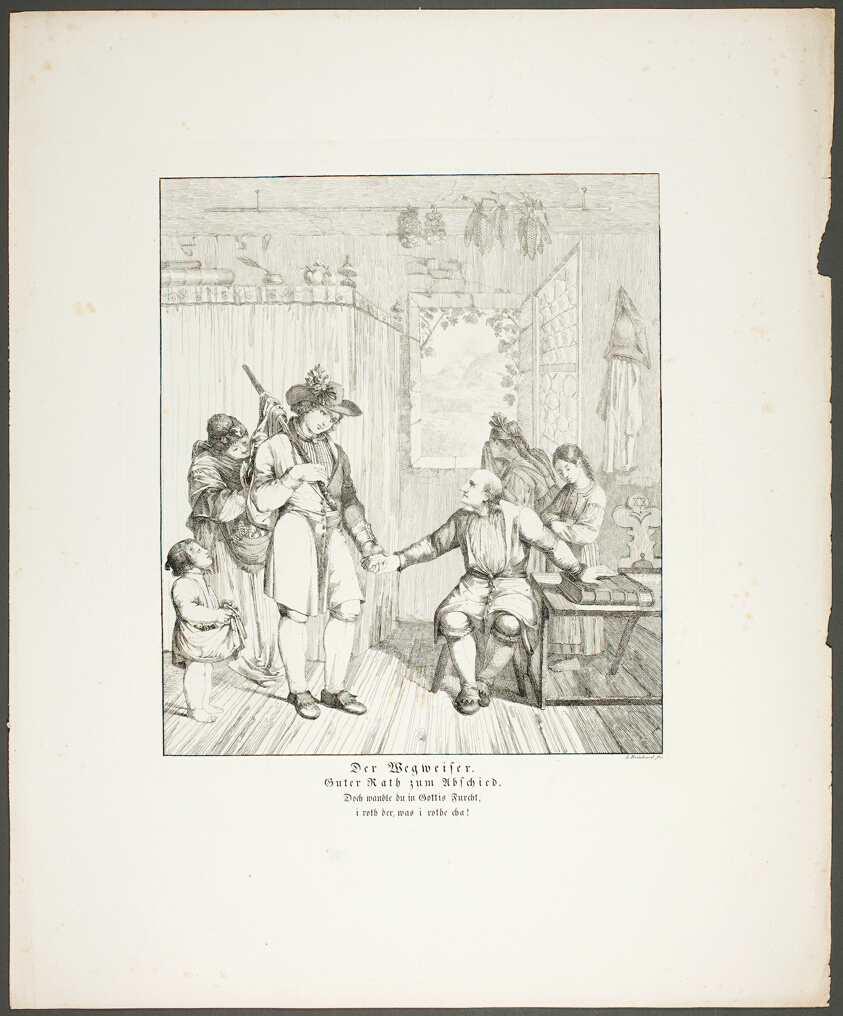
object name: Print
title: The Signpost (Der Wegweiser), plate ten from the series Poems in the Dialect of the Upper Rhine Region (Zehn Blätter zu Hebels Alemannischen Gedichten)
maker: Sophie Reinhard (German, 1777-1843); published by Mohr und Winter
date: 1820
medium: Etching on cream wove paper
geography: Germany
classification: etching; print; prints and drawing